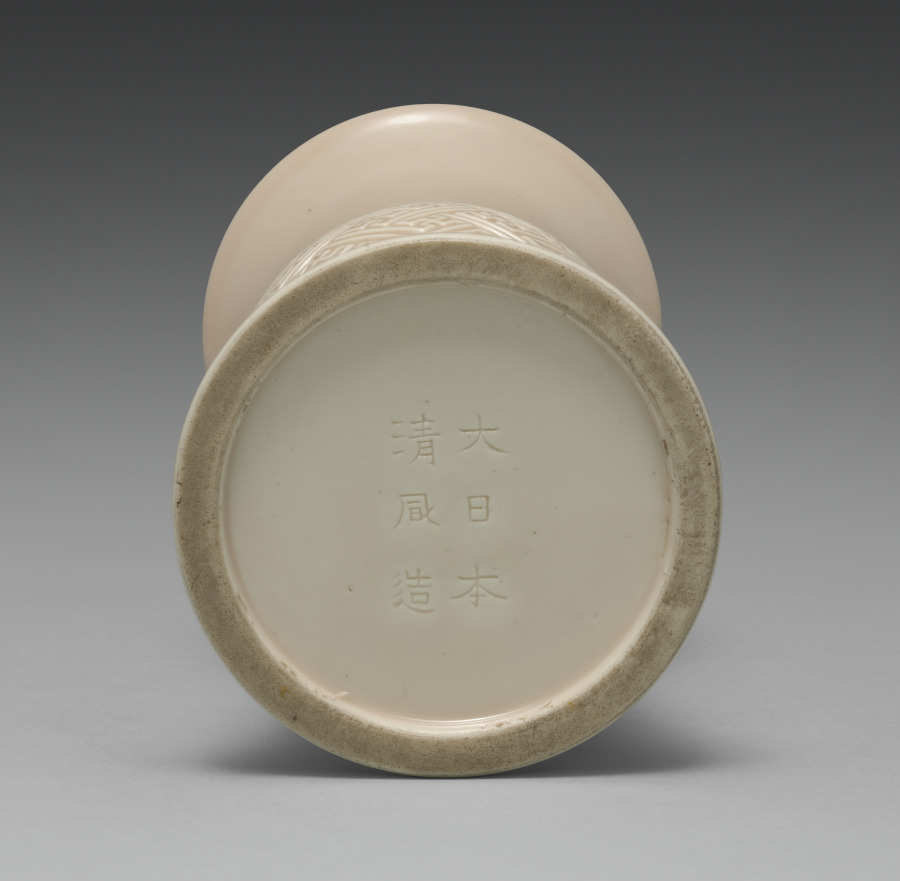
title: Gu-Shaped Flower Vase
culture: Japan, Meiji period (1868–1912)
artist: Seifū Yohei III (Japanese, 1851–1914)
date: 1893–97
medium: Glazed porcelain with molded and carved designs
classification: Ceramic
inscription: 大日本清風造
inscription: This gu-shaped vase has “cherry blossom glaze” (ōkayū), according to the inscription on its box.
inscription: A label affixed to the side of the box gives a sense of how previous owners conceived of the piece. Although the label is partially abraded, one can make out the character nezu 鼠, used in the names of numerous light pinks, from Naniwa pink (Osaka pink) to Miyako pink (Kyoto, or capital, pink). Also legible is the phrase hakugōrai, a broad term that can describe a shade of white associated with ceramics discovered in Korean tombs, but often applied to other ceramics of similar coloration, many from Chinese kilns, including Ding (J. Tei) ware of the Northern Song dynasty.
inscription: 清風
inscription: 帝室技芸員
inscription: 清風與平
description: Seifū Yohei III was the most prominent head of a ceramics studio in Kyoto that specialized in Chinese-style porcelains and especially items for use in sencha (煎茶), or the drinking of steeped-leaf tea with companions. Sencha was popular among the bunjin of Kyoto and Osaka, who often enjoyed it as part of their emulation of Chinese culture. While sencha was by design less formal than the Japanese tea ceremony, it still featured the display of treasured objects. Prized Chinese antiquities were generally unobtainable, so substitutes such as the Gu-Shaped Flower Vase were much in demand.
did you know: This gu-shaped vase has “cherry blossom glaze” (ōkayū), which Yohei III invented in 1890.